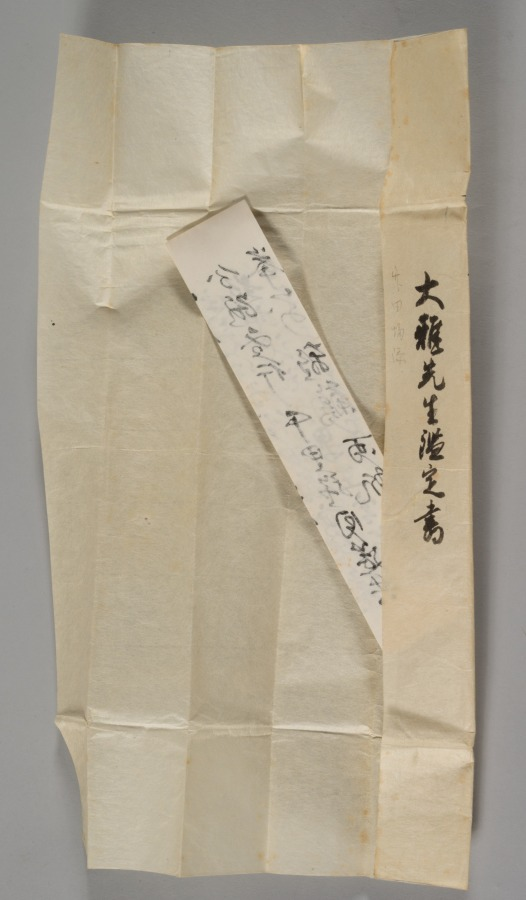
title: Mountain View and Blue Water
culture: Japan, Edo period (1615–1868)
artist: Tanomura Chikuden (Japanese, 1777–1835)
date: early 1800s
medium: hanging scroll; ink, color, and gold on paper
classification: Painting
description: Tanomura Chikuden was an eminent painter whose adopted son, Tanomura Chokunyū (1814–1907), was Seifū Yohei III’s painting teacher. This work was displayed at a gathering commemorating the 10th anniversary of Chokunyū’s death, something we know only because its custom-made box and archival documents have been carefully kept together. The box inscription also confirms that Chikuden was emulating the style of the Mi family of painters, active during China’s Southern Song dynasty (1127–1279). The painting’s Chinese-style silk wrapper is inscribed and sealed on its interior by members of Chokunyū’s community.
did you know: The mountain shapes are built up with multiple small wet strokes.